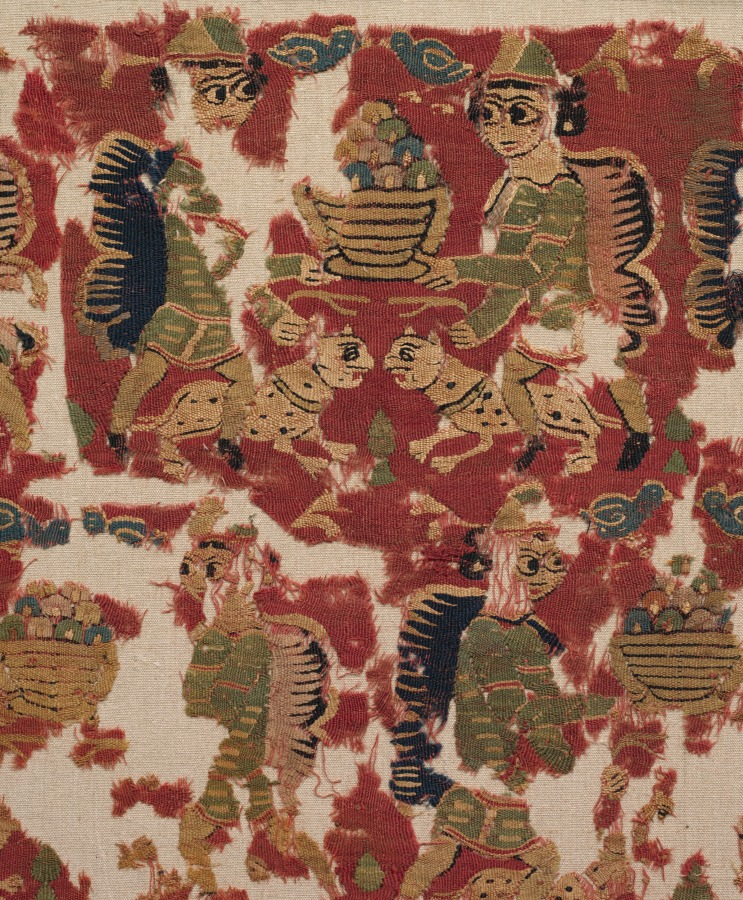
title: Fragment of a Large Hanging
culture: Egypt, Antinoë, Byzantine period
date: 500s CE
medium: tapestry weave (with plain tabby borders): wool and linen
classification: Textile